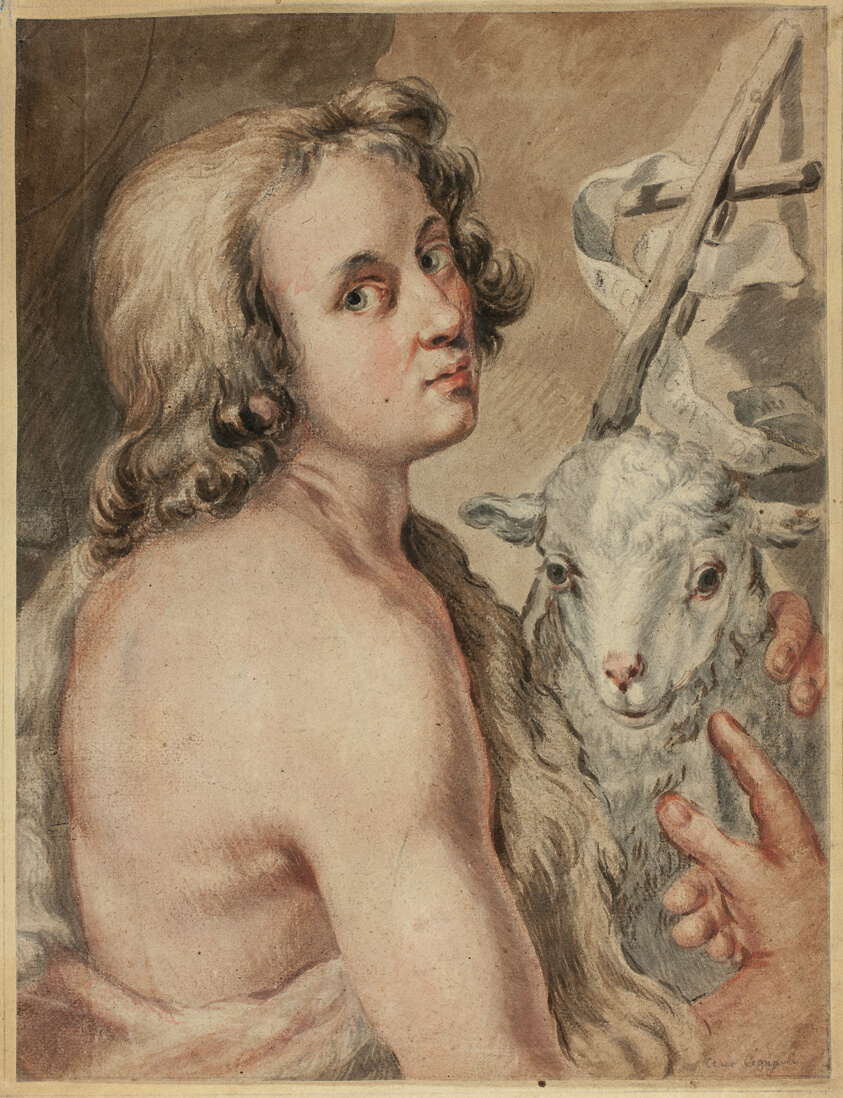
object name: Drawing and Watercolor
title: Saint John the Baptist with Lamb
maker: After Carlo Cignani; Italian, 1628-1719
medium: Watercolor over black chalk, on tan laid paper, tipped onto cream laid paper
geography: Italy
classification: watercolor; drawings (visual works); prints and drawing